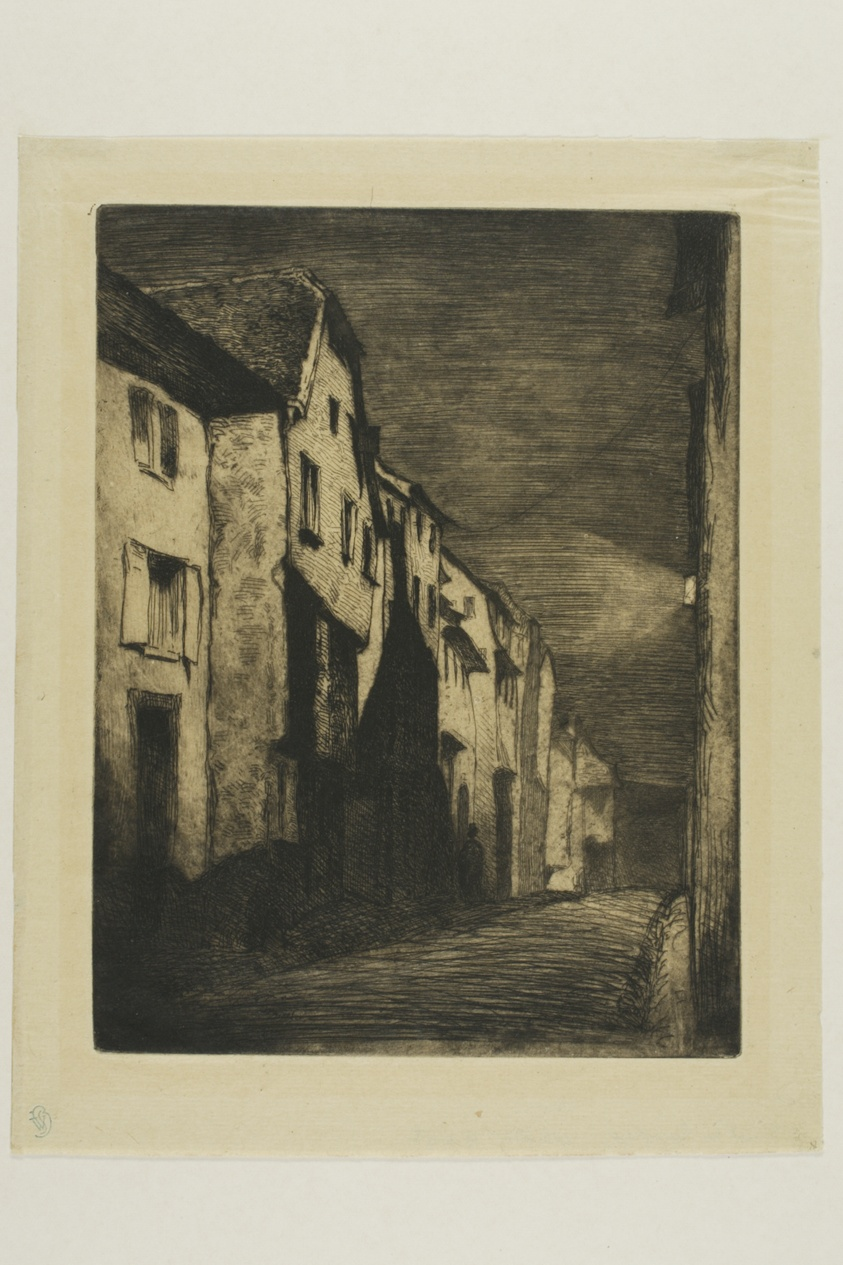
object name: Print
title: Street at Saverne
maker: James McNeill Whistler (American, 1834-1903)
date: 1858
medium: Etching with foul biting in black ink on tan Japanese paper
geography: United States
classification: etching; foul biting; print; prints and drawing; paper